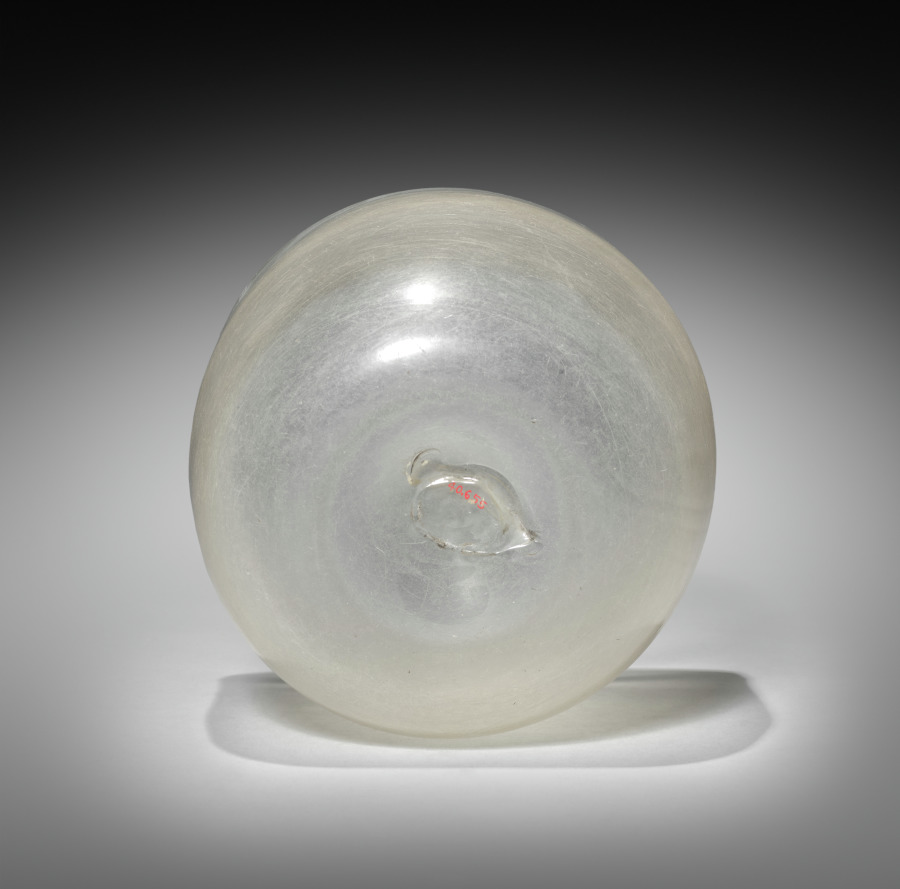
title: Bowl with Stand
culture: Syria, Roman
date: 100–400 CE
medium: glass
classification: Glass